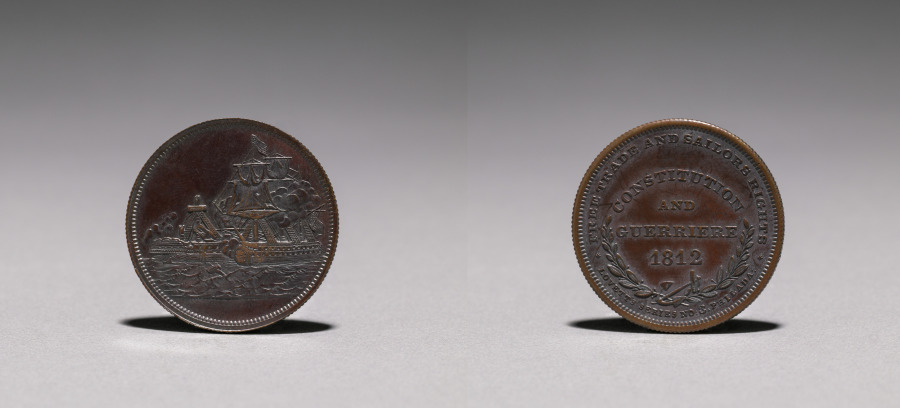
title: Medal: Constitution and Guerriere, 1812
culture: America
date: 1812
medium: bronze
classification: Metalwork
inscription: Constitution and Guerriere, 1812. Free Trade and sailors rights.